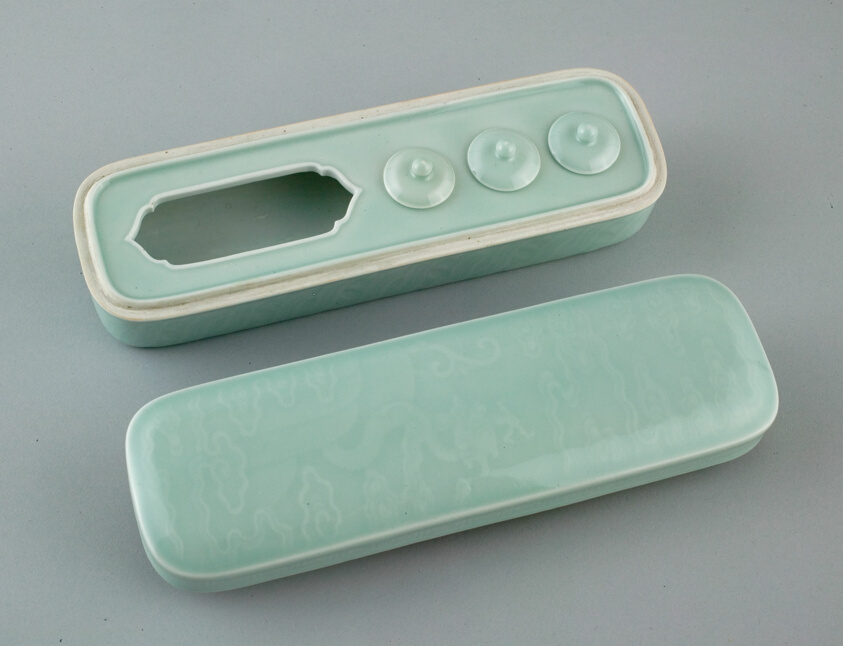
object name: Vessel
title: Writing Box with Dragons amid Clouds, Fitted with Small Containers for Ink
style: Chinese (culture or style)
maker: China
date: Qing dynasty (1644–1911), Qianlong reign mark and period (1736–1795)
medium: Porcelain with underglaze molded decoration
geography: China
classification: porcelain; ceramics; asian art; vessel